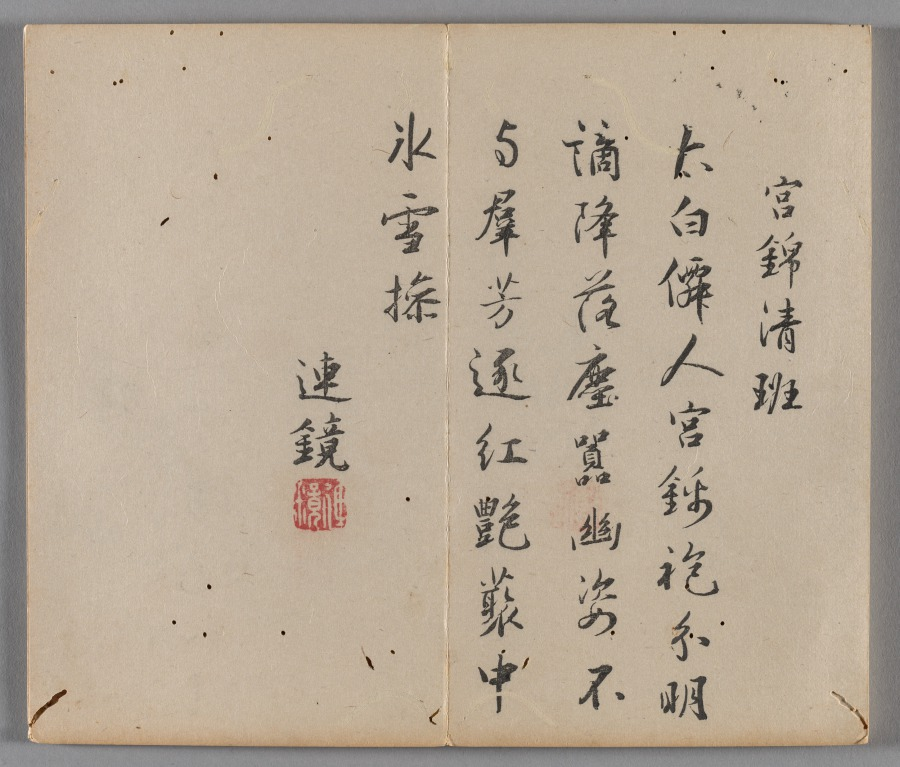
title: Ten Bamboo Studio Painting and Calligraphy Handbook (Shizhuzhai shuhua pu): Plum Blossoms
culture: China, Qing dynasty (1644-1911)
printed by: Hu Zhengyan (Chinese, c. 1584–1674)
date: 1633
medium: Woodblock-printed book; ink and colors on paper; first edition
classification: Print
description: Color printing reached a level of perfection in the early 1600s, as seen in this Ten Bamboo Studio Collection of Calligraphy and Painting and the Mustard Seed Garden Manual of Painting (printed 1679 and 1701). The painterly quality, precision in registering (aligning) the woodblocks, and harmonious colors made them the most successful color print editions in Chinese history. Both editions were printed and compiled in Nanjing, spread nationwide, and had a great impact on the arts in Japan and Korea.